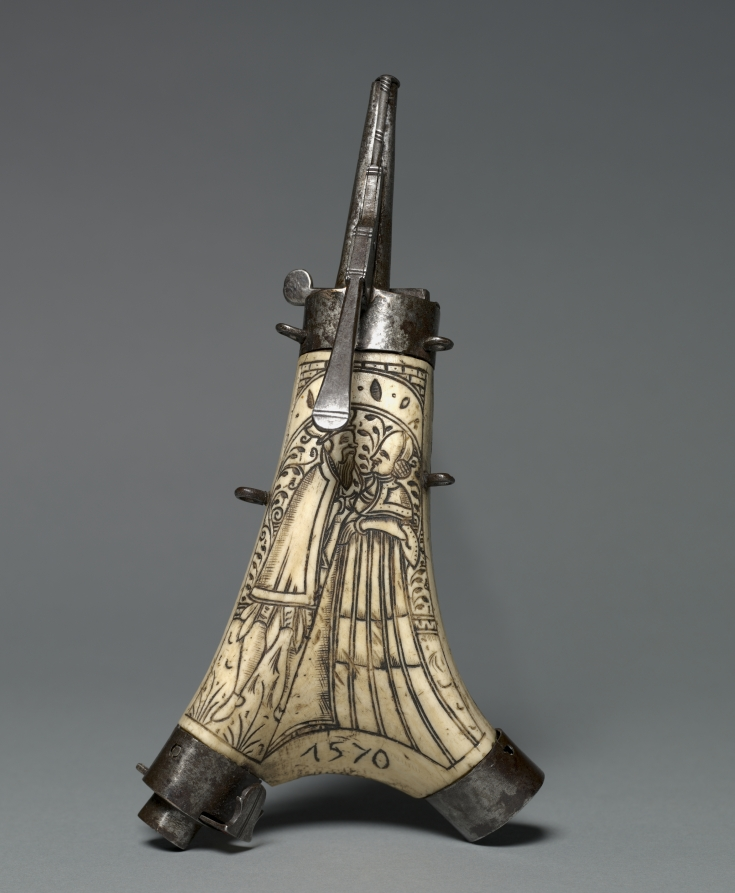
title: Powder Flask with Standing figures of a Man and Woman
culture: Germany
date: 1570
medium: elk horn, steel mounts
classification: Arms and Armor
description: Powder flasks are small, portable containers designed to hold gunpowder. From the 1400s to the 1800s, powder flasks were indispensable for charging and priming firearms of all types. Without powder flasks firearms were of little use to their owners. Many highly decorated flasks rank as works of art. During the 1500s, they were frequently decorated with images of famous historical figures.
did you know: The year 1570 can be seen below the standing male and female who may represent the original owners.